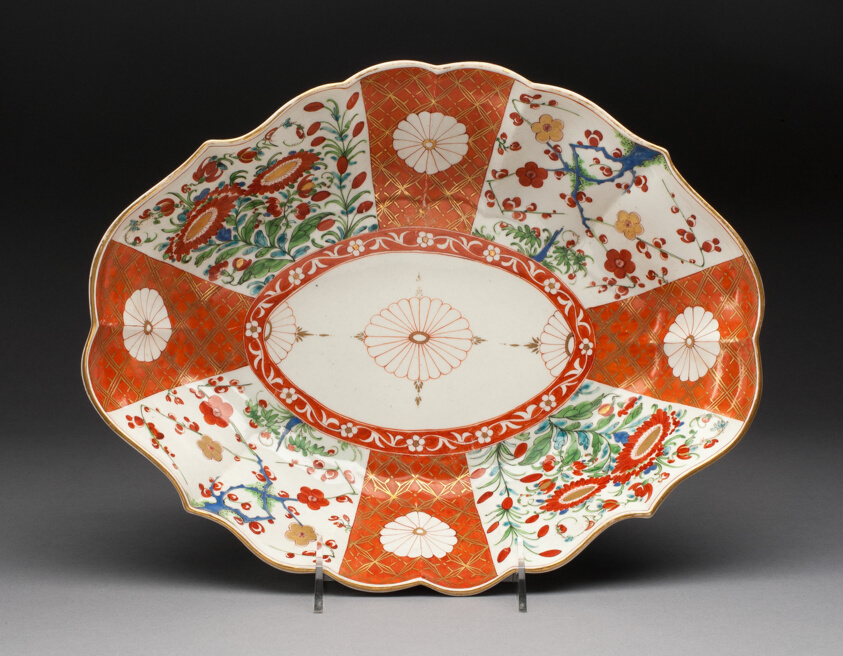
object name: Ceramics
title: Dish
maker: Worcester Porcelain Factory (Warmstry House Period, 1751–1783); Worcester, England, founded 1751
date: c. 1770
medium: Soft-paste porcelain, polychrome enamels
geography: Worcester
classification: dish (vessel); porcelain; european decorative arts; ceramics